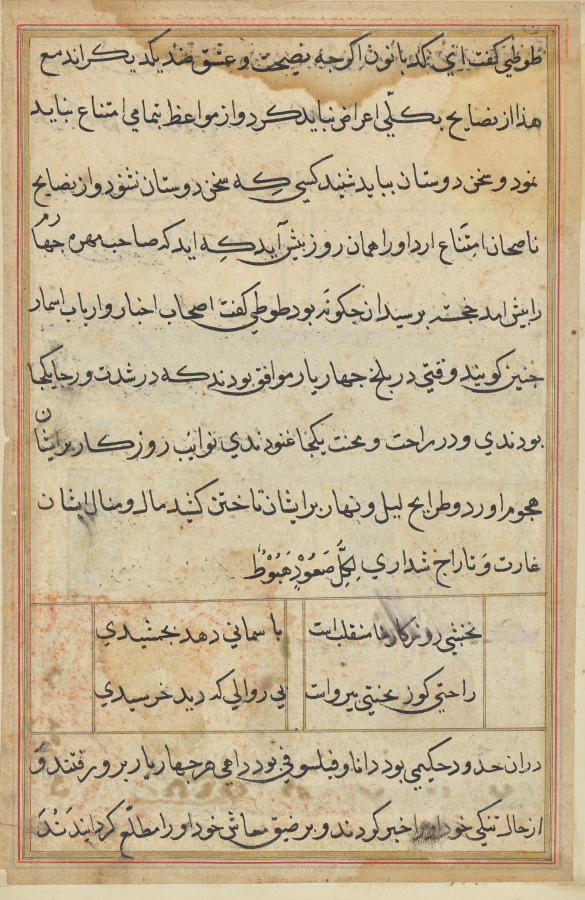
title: Page from Tales of a Parrot (Tuti-nama): text page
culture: Mughal India, court of Akbar (reigned 1556–1605)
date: c. 1560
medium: gum tempera, ink, and gold on paper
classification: Painting